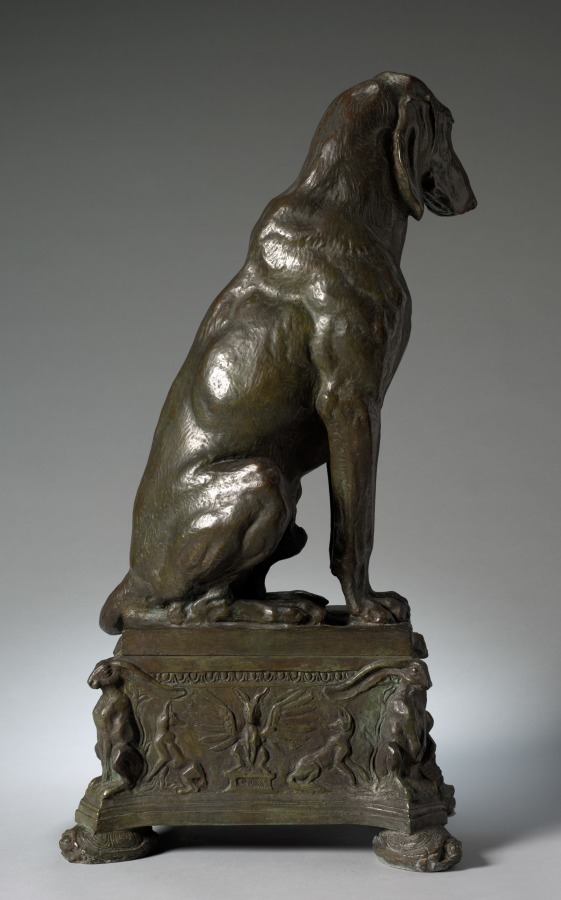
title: Hound (2 of 2)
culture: America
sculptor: Charles Cary Rumsey (American, 1879–1922)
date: 1912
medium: bronze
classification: Sculpture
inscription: Signed on plinth: © C. C. Rumsey